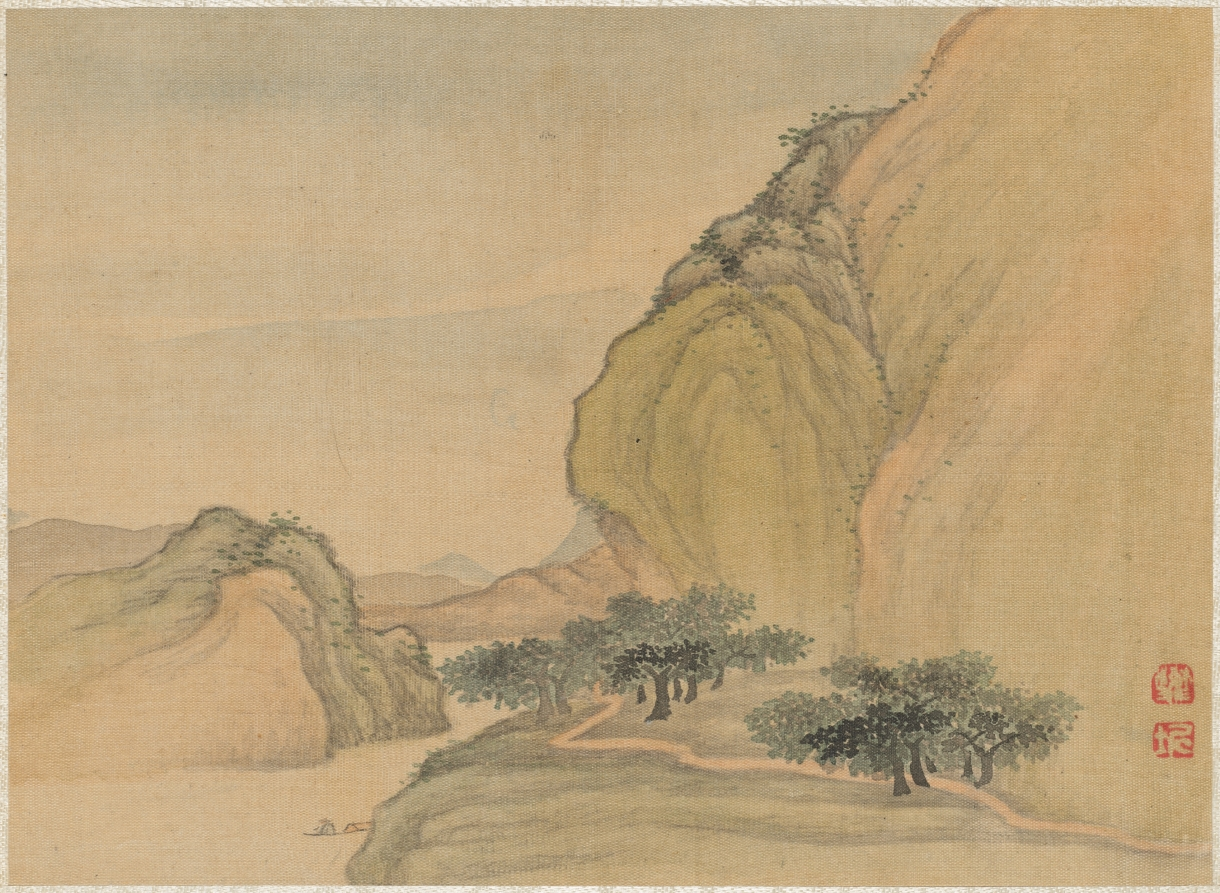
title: Album of Miscellaneous Subjects, Leaf 1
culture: China, Qing dynasty (1644-1911)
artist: Fan Qi (Chinese, 1616–after 1694)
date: early 1650s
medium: album cover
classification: Painting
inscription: Artist seal: Fan Qi 樊圻. Poem by Wang Wu 王武 (1632–1690): A narrow path coiling, winds across rock foundations;/ Old vines and ancient trees meet the sunset's slanting rays./ Unaware that my small boat has gone so far,/ By the time it reverses its oars, the green mountains will be half-covered with clouds.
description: Fan Qi's painting on leaf one may be inspired by Tang dynasty poet's Li Bai's line: A small boat has sailed through ten thousand layers of hills. Wang Wu's colophon facing the painting reads: A narrow path coiling, winds across rock foundations; Old vines and ancient trees meet the sunset's slanting rays. Unaware that my small boat has gone so far, By the time it reverses its oars, the green mountains will be half-covered with clouds.